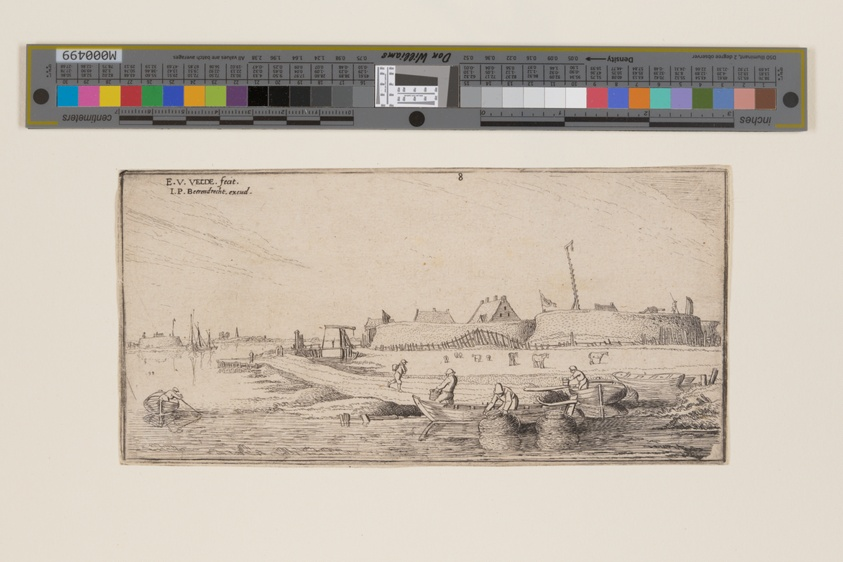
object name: Print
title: Fishermen in Rowboats Before a Walled Town, from Landscapes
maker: Esaias van de Velde; Dutch, 1587–1630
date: c. 1610-1630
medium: Etching on ivory laid paper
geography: Netherlands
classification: etching; paper; print; prints and drawing